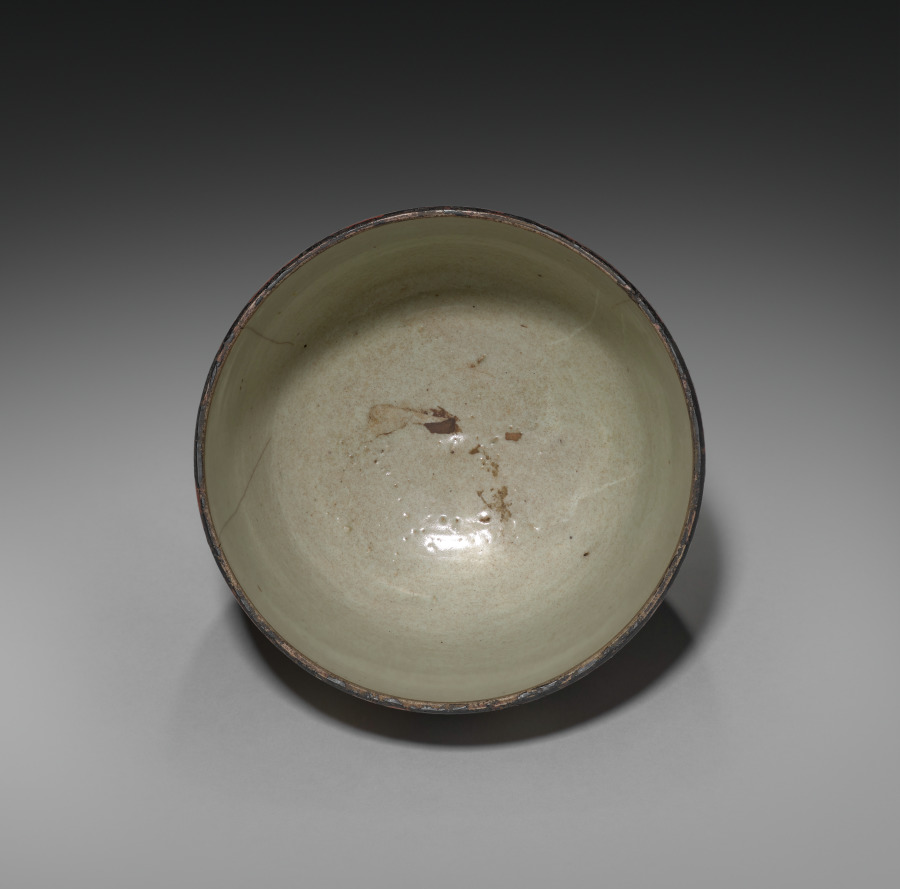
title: Jar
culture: Siam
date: 1800s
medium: porcelain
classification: Ceramic